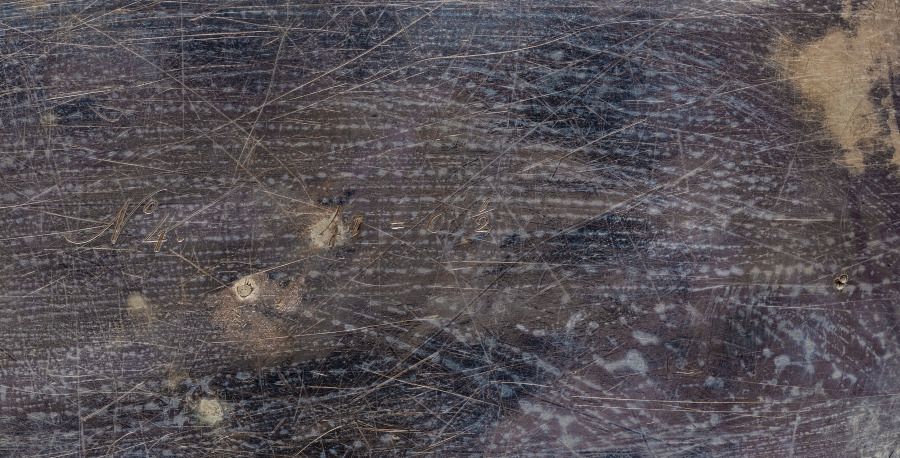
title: Tray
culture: England, 18th century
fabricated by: Paul Jacques de Lamerie (British, 1688–1751)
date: 1745–1746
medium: silver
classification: Silver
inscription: Scratched underside: "No 4.", "41 = 0 1/2".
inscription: Two crests engraved on either side of face: A lion and the other states, "Tout Est Vanite".